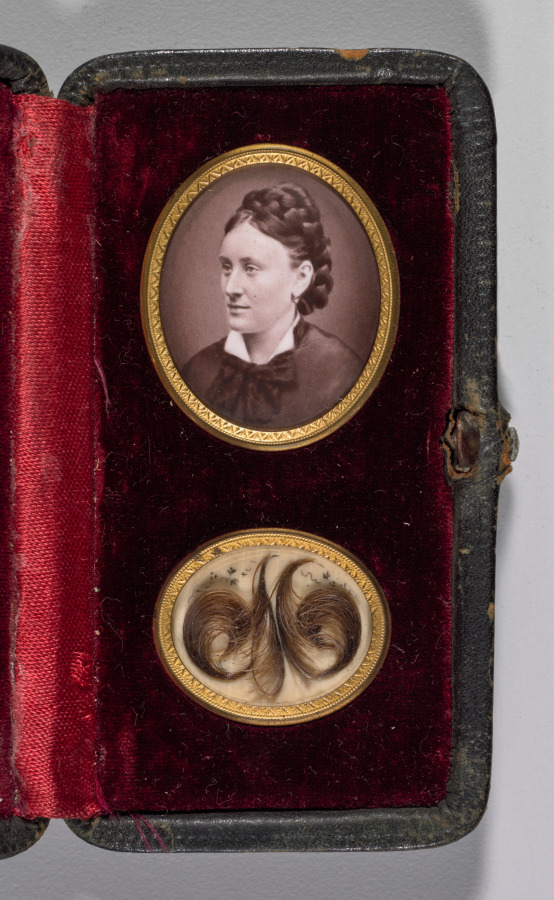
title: Untitled (Case with portraits of a man and woman and hair ornaments)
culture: 19th century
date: c. 1870s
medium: Photographs: photographs on enamel, framed in copper alloy metal frames; hair lockets: hair with pen and black and ink on cream-colored backing; case: leather with metal push-clasp and velvet-lined interior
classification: Photograph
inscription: No visible inscriptions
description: The photographs of this man and woman, presumably husband and wife, are juxtaposed with clippings of their hair arranged to form their initials, A and M. In the late 1800s, photographic portraits and hair clippings combined in jewelry or frames served as mementos or memorials for loved ones. For permanence, the portraits here were vitrified on enamel, a process now used primarily for funerary monuments.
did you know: "Hairwork," produced in commercial workshops and as a popular craft during the Victorian era, was used to celebrate the living and commemorate the dead.